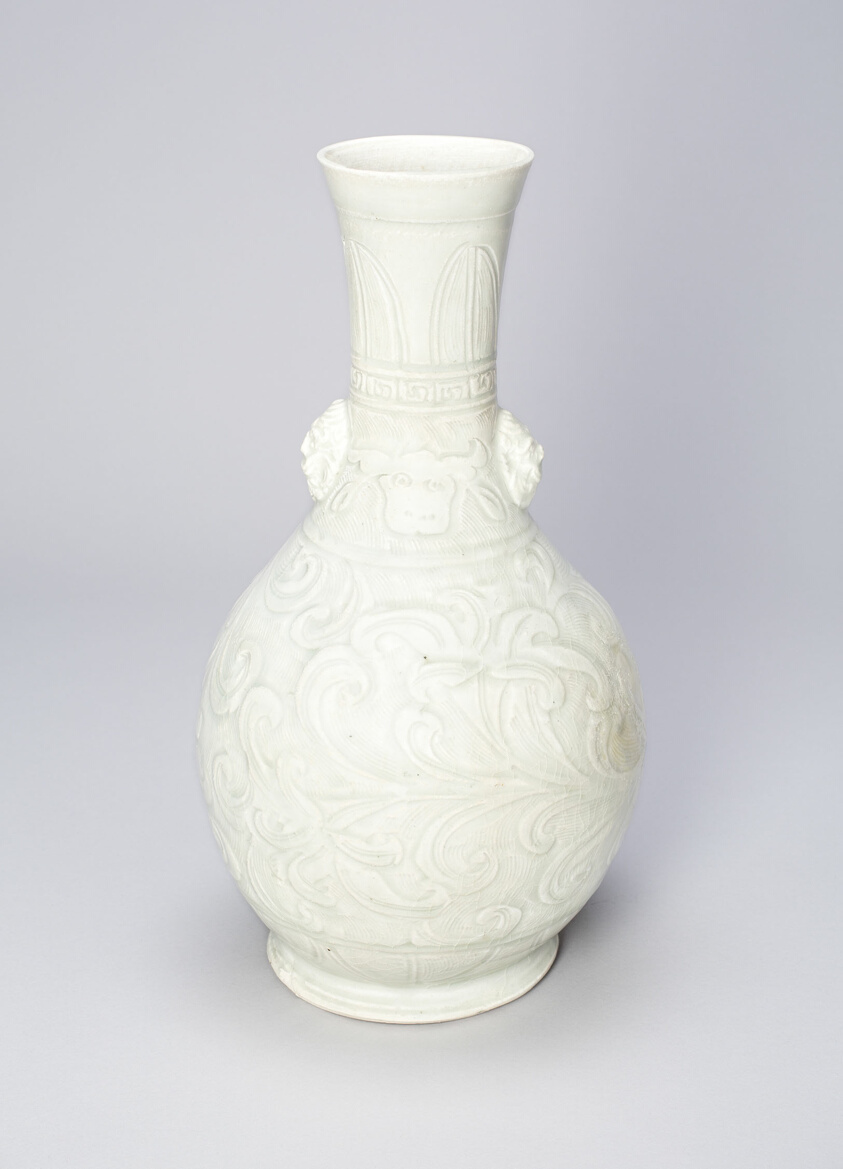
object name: Vessel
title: Vase with Ox Masks and Upright and Curling Leaves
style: Chinese (culture or style)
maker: China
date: Southern Song dynasty (1127–1279)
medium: Qingbai ware; glazed porcelain with underglaze carved and molded decoration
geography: China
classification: vase; vessel; porcelain; ceramics; asian art